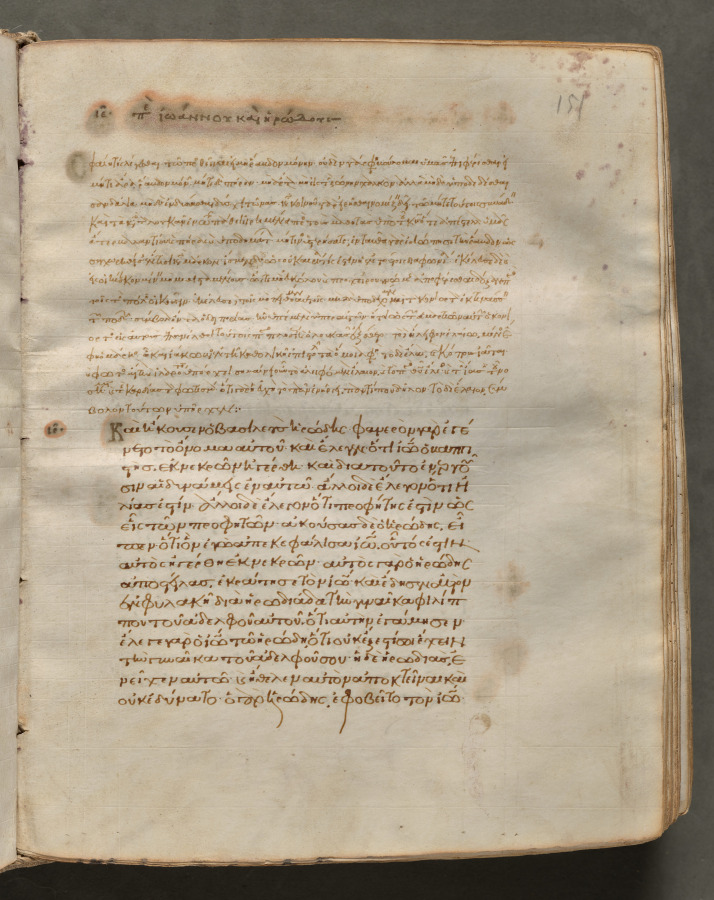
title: Text, folio 151 (recto), from a Gospel Book with Commentaries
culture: Byzantium, Constantinople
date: c. 1000–1100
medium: ink, tempera, and gold on vellum; leather binding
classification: Bound Volume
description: Each of the four gospels in this book opens on a page with brilliantly illuminated borders depicting the author of the text as well as birds-principally peacocks, symbols of the immortality of the soul-and fountains, representing the fountain of life and the salvation of the soul. This volume consists of 428 leaves with texts in Greek. Its level of sophistication suggests that it was probably written and decorated in a monastery in Constantinople.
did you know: Gospel Books were carried in procession through Byzantine churches.